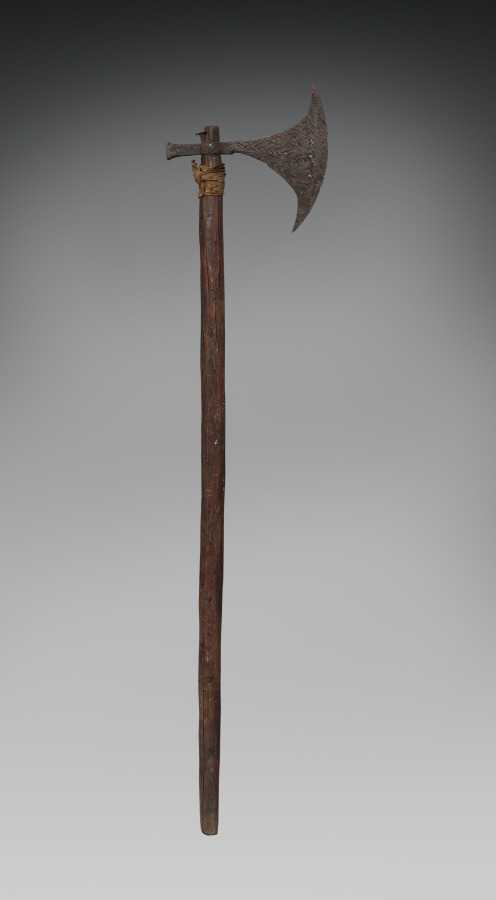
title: Axe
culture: Philippines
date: Before 1922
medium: Blade: metal; handle: wood and natural fibers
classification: Arms and Armor